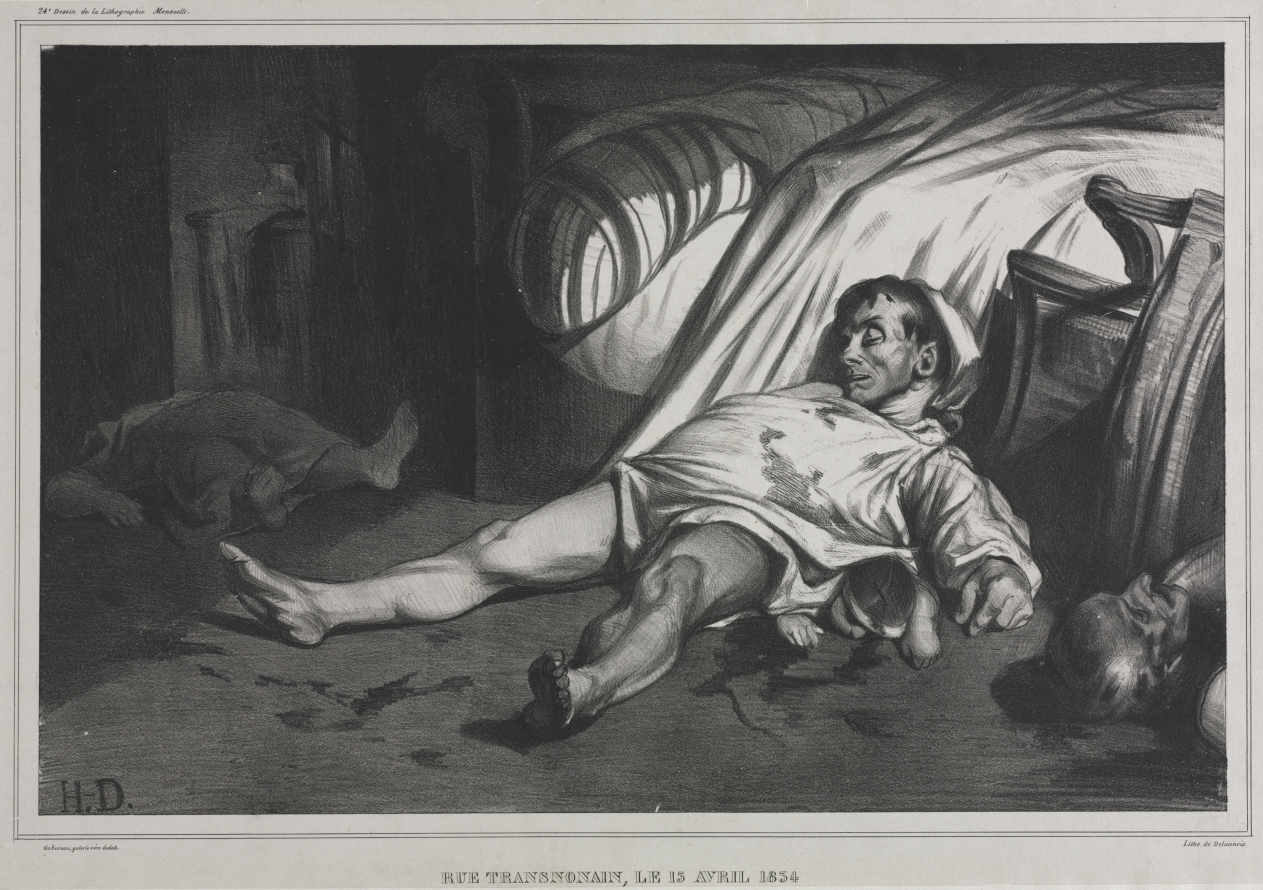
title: Rue Transnonain, April 15, 1834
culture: France, 19th century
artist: Honoré Daumier (French, 1808–1879)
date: 1834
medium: lithograph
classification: Print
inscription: Below image: RUE TRANSNONAIN, LE 15 AVRIL 1834.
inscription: Upper margin, printed: 24e Dessin de la Lithographie Mensuelle. ; lower margin, printed: Au bureau, galerie vero dodat. / Litho de Delaunois ; lower margin, in pencil: Superb proof on india / 450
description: Although it supported the French middle class, the government of Louis-Philippe (1773–1850) oppressed workers. The rebellion of the silk weavers of Lyon, who toiled 18 hours a day for a pittance, touched off a sympathetic revolt in Paris. During the uprising, sniper fire directed toward government troops emanated from a house on the Rue Transnonain. In retaliation, the soldiers indiscriminately massacred residents, including old men, women, and children. In this haunting image, Daumier focused attention on the human suffering and loss of life, emphasizing the innocence of the victims and the violence of their deaths. Between 1830 and 1835 censorship laws had been suspended, allowing Charles Philipon (1806–1862) to publish a number of periodicals like L'Association Mensuelle, where Rue Transnonain appeared. Daumier, one of the most accomplished and prolific lithographers of the 19th century, often provided caricatures criticizing contemporary political abuses or satirizing French society.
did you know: Although government censors approved publication of this print, they seized it upon its exhibition in a Parisian print shop.